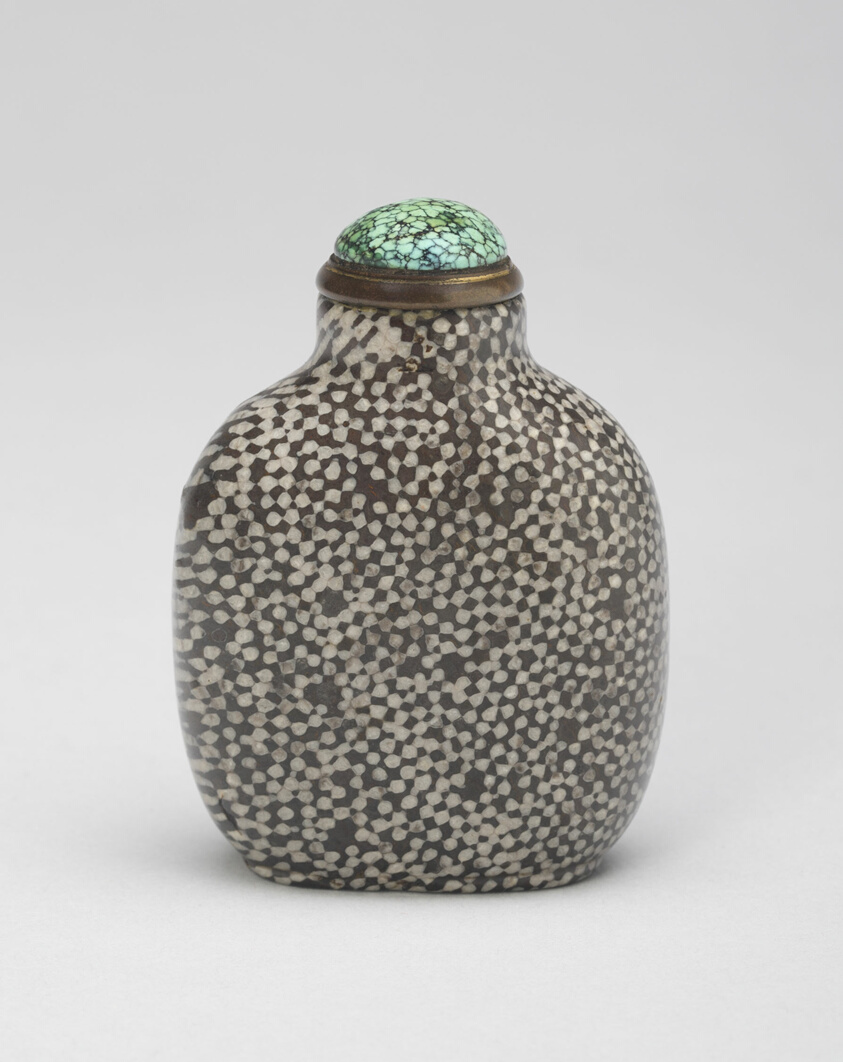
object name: Vessel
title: Snuff Bottle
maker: China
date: Qing dynasty (1644–1911)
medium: Fossil coral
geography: China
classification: snuff bottle; asian art; vessel